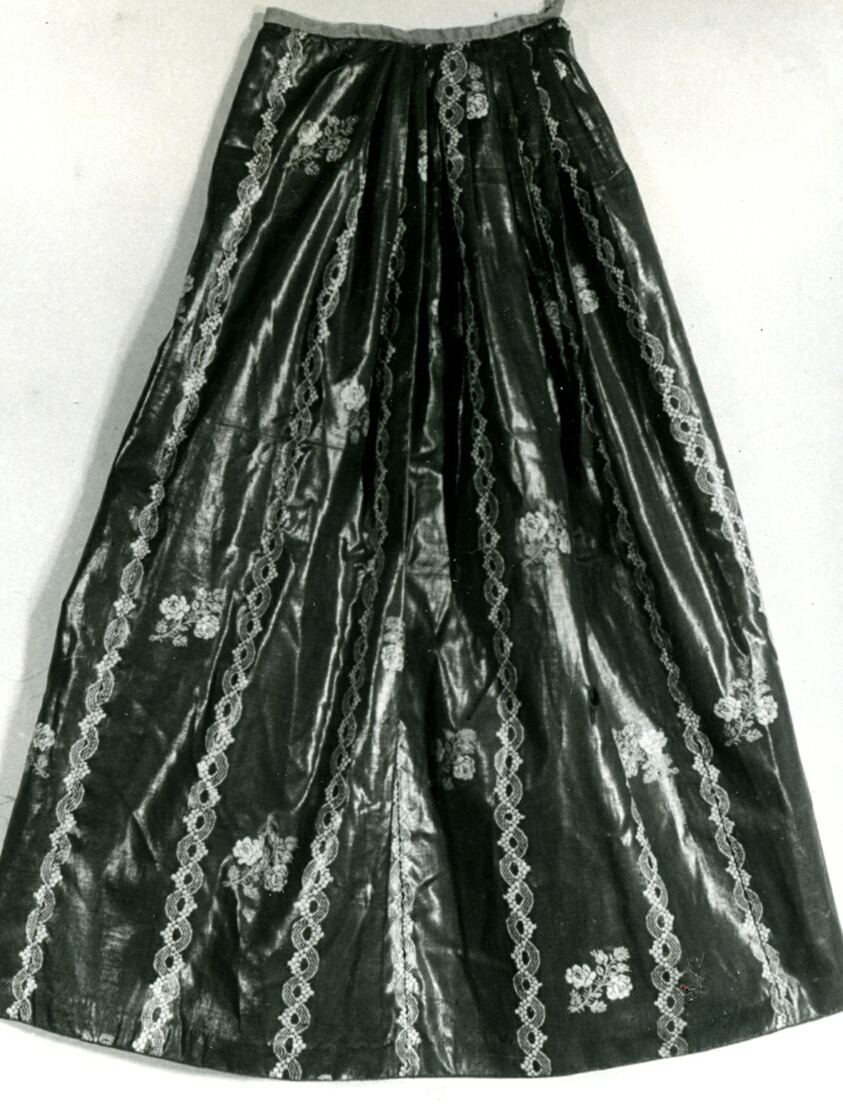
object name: Costume and Accessories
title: Apron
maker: France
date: 1701/50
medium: Wool, plain weave; glazed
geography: France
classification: textile; weaving; costume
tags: fashion